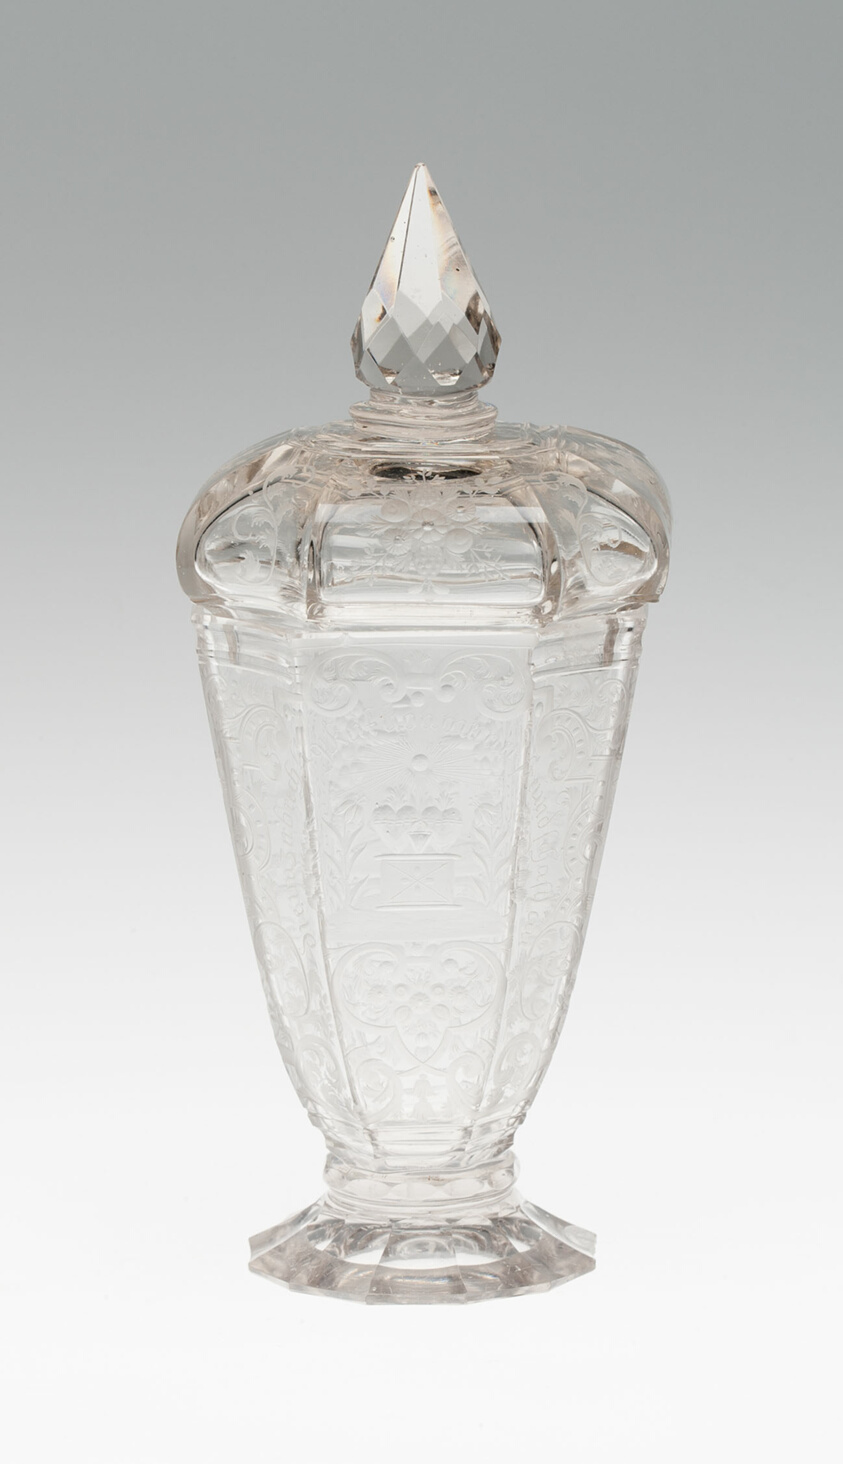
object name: Glass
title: Covered Friendship Goblet (Pokal)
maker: Germany, Schleswig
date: c. 1730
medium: Glass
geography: Schleswig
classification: drinking vessel; glass; european decorative arts